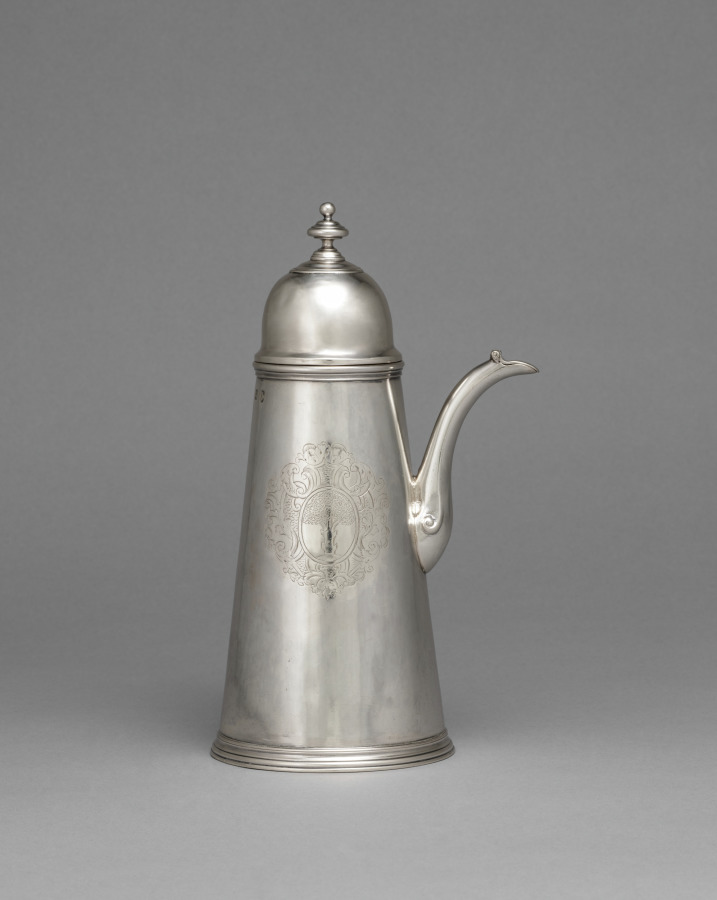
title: Coffee Pot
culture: England, London, 18th century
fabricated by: John Chartier (British)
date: 1702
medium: silver, wooden handle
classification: Silver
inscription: scratched on base: "21=16"; "21=12." Coat of arms engraved in contemporary mantling: oak tree with four lower branches beginning to sprout. (Arms of "Here" family.)